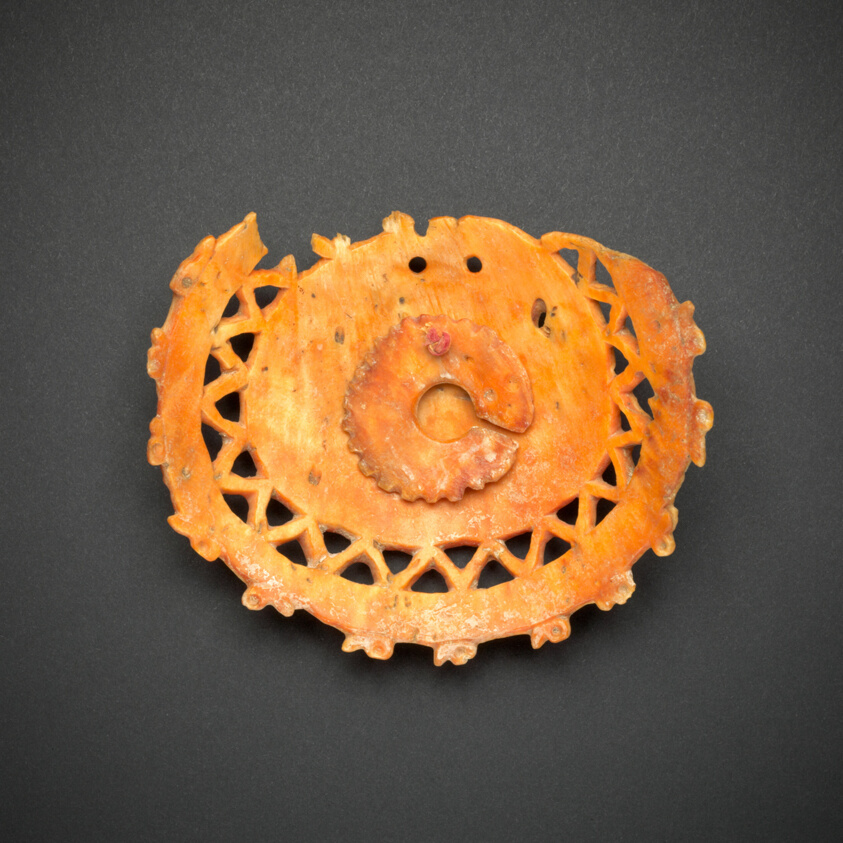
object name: Costume and Accessories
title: Circular Pendant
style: colima, mesoamerican, Pre-Columbian, americas, jalisco, west mexico, Arts of the Americas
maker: Colima or Jalisco; Colima or Jalisco, Mexico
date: 200 BCE–200 CE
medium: Spondylus shell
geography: Western Mexico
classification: pendant (jewelry); shell; art of the americas; jewelry; costume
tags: jewelry, birds, water, shells